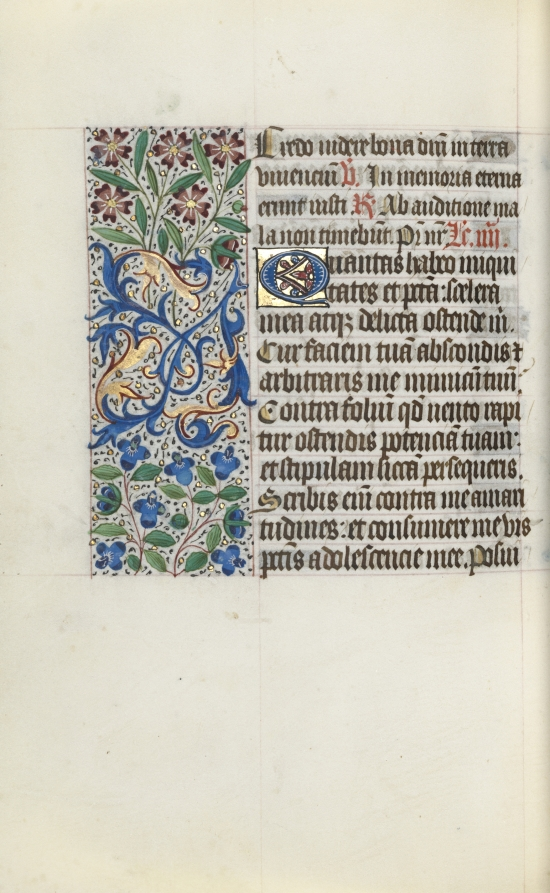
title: Book of Hours (Use of Rouen): fol. 122v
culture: France, Rouen, 15th century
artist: Master of the Geneva Latini (French, active Rouen, 1460–80)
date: c. 1470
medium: ink, tempera, and gold on vellum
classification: Bound Volume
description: In the late 1400s and early 1500s Rouen was an established and important center of book production. The city’s cathedral had a wealthy chapter that spent large sums of money to commission books and to maintain its extensive library. The stationers and booksellers would have likely been concentrated in or near the cathedral precinct. This artist, named after a manuscript now in Geneva, was Rouen’s principal illuminator during the second half of the 1400s.